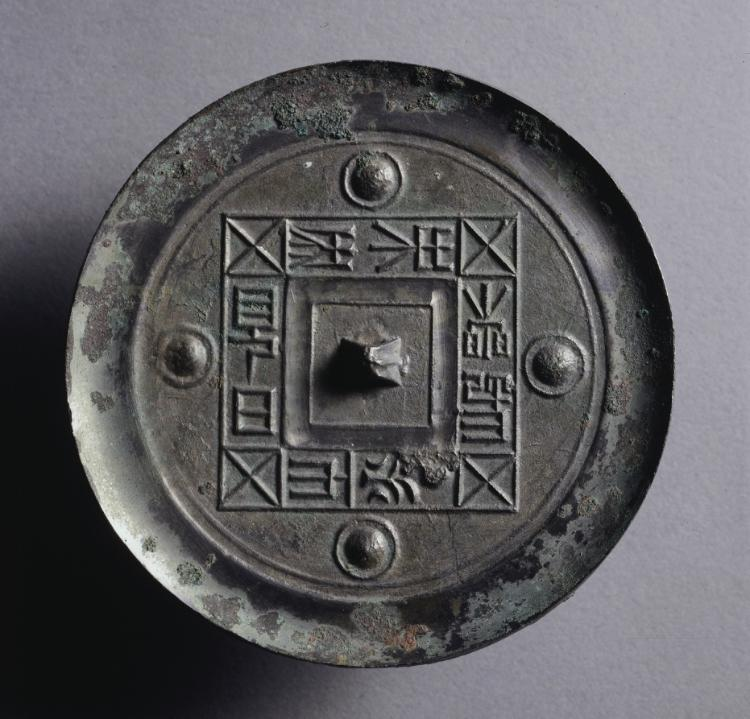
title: Mirror with a Square Band and Four Nipples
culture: China, Western Han dynasty (206 BCE–8 CE)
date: late 200s–early 100s BCE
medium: bronze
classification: Metalwork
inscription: May you see the light of the sun, and live in endless joy!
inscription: 見日之光，長樂未央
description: Inscription: May you see the light of the sun, And live in endless joy!